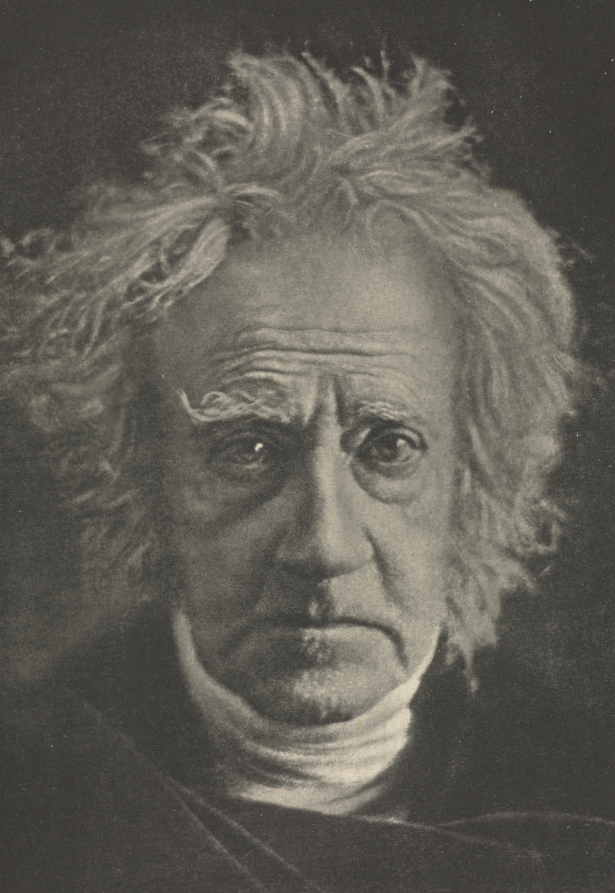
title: Camera Work: Herschel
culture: England, 20th century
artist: Julia Margaret Cameron (British, 1815–1879)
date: 1913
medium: photogravure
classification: Bound Volume